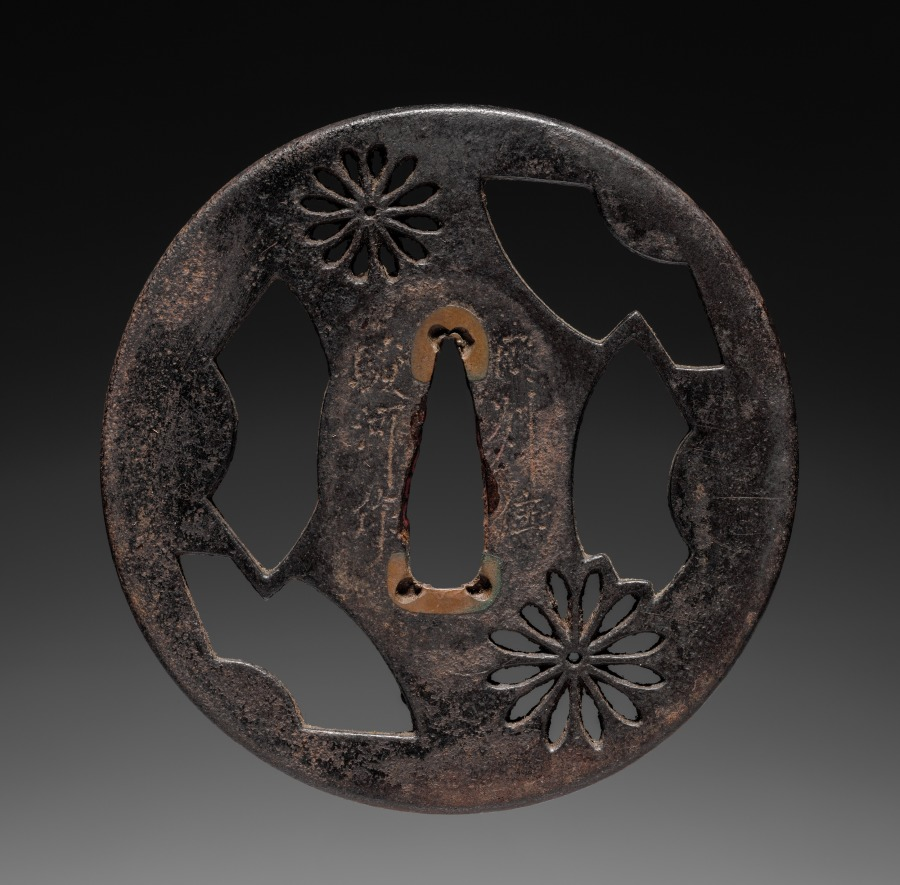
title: Sword Guard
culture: Japan, Edo period (1615–1868)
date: early 1700s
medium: iron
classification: Arms and Armor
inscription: Signature: Suruga, residing in Inaba province, made